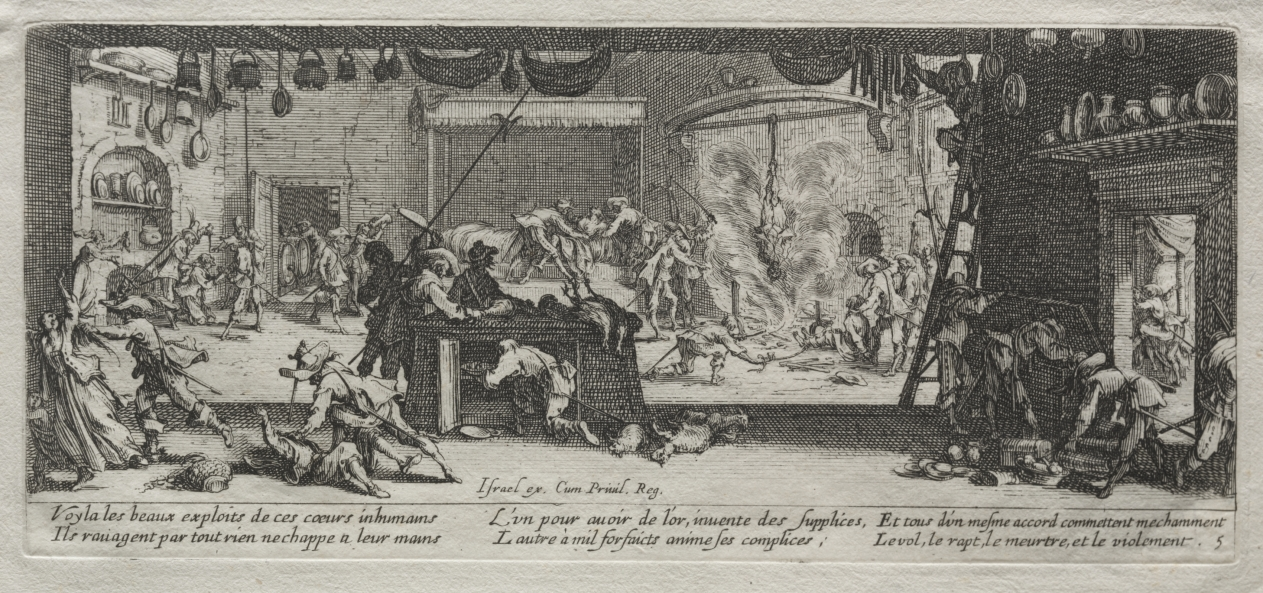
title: The Large Miseries of War: Pillaging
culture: France, 17th century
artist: Jacques Callot (French, 1592–1635)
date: 1633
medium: etching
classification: Print